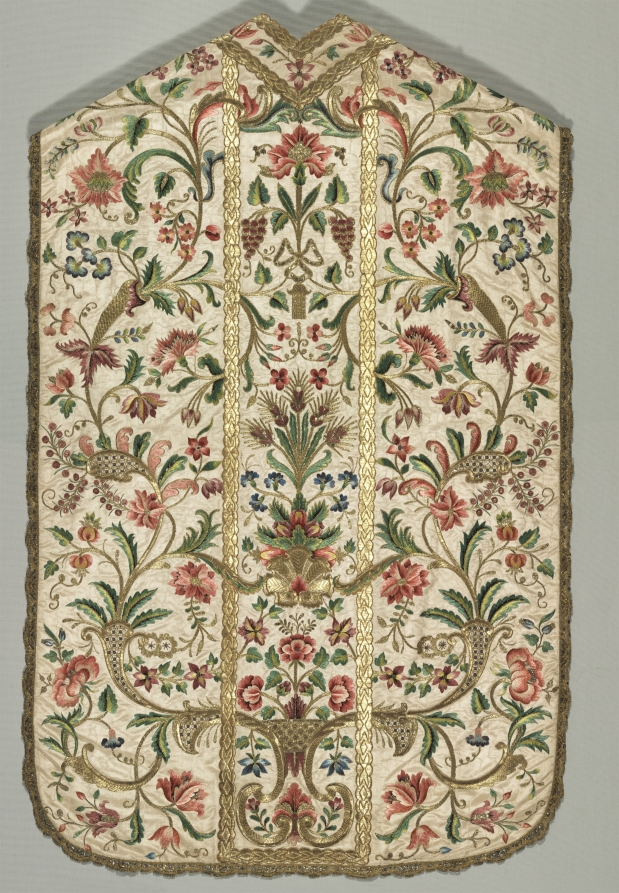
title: Chasuble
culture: Italy, 18th century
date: 1700s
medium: Silk and metallic threads; embroidery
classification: Textile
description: A beautiful design emanates from a vase in the center of this chasuble, displaying symmetrical flora that extend across embroidered gold braids into graceful curvilinear cartouches, reflecting contemporary architectural decoration. Also in the center, sheaves of wheat and grapes represent the bread and wine of the Mass. Gold sequins within thread-outlined squares illustrate fine quality workmanship. The decoration of the stole and chalice veil is similar to the chasuble, also on moiré (watered) silk fabric. The stole, an insignia of the office of deacons and priests, is worn under a chasuble, and the chalice veil—bearing the monogram of Jesus Christ, ihs, in the center—covers the chalice and paten (the plate holding the Eucharistic bread).